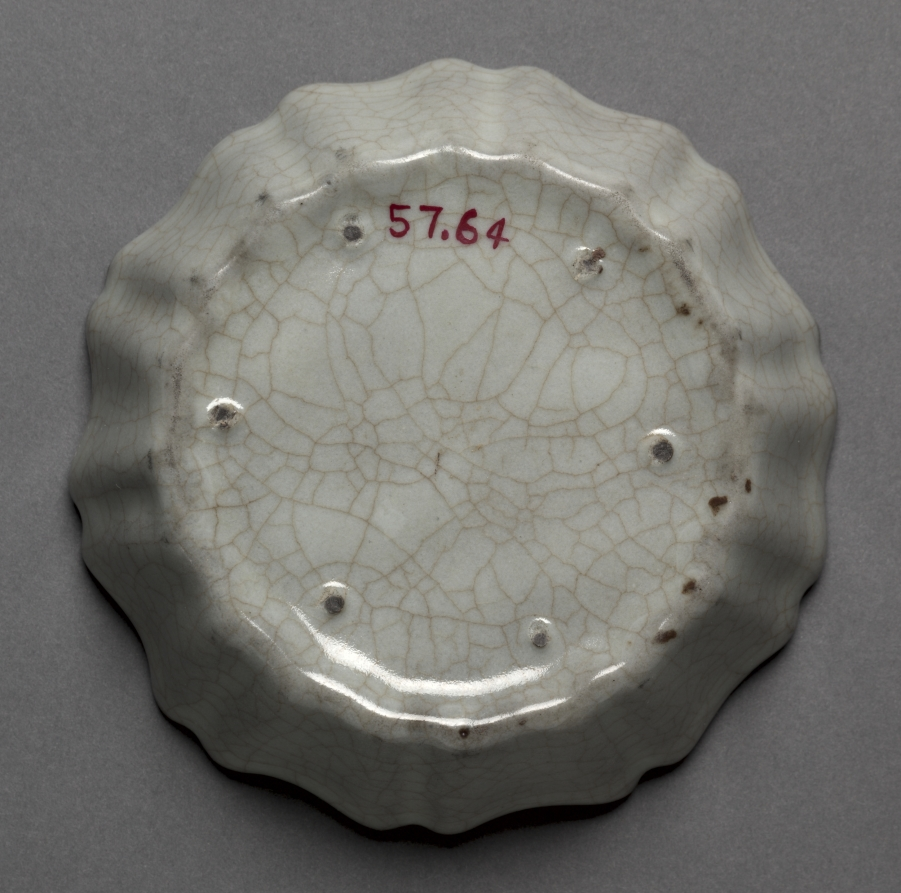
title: Brush Washer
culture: China, Southern Song dynasty (1127-1279)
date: 1200s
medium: porcelaneous stoneware, Guan ware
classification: Ceramic